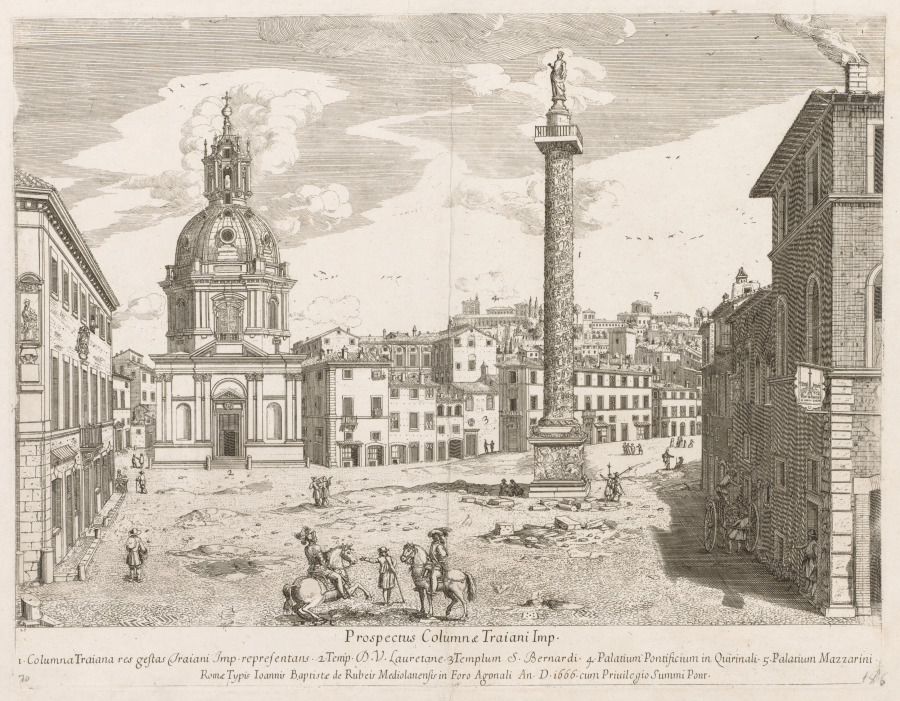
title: Trajan's Column from "Prospectus Locurum Urbis Romae Insign[ium]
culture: Flanders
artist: Lievin Cruyl (Flemish, c. 1640-c. 1720)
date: 1666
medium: etching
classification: Print